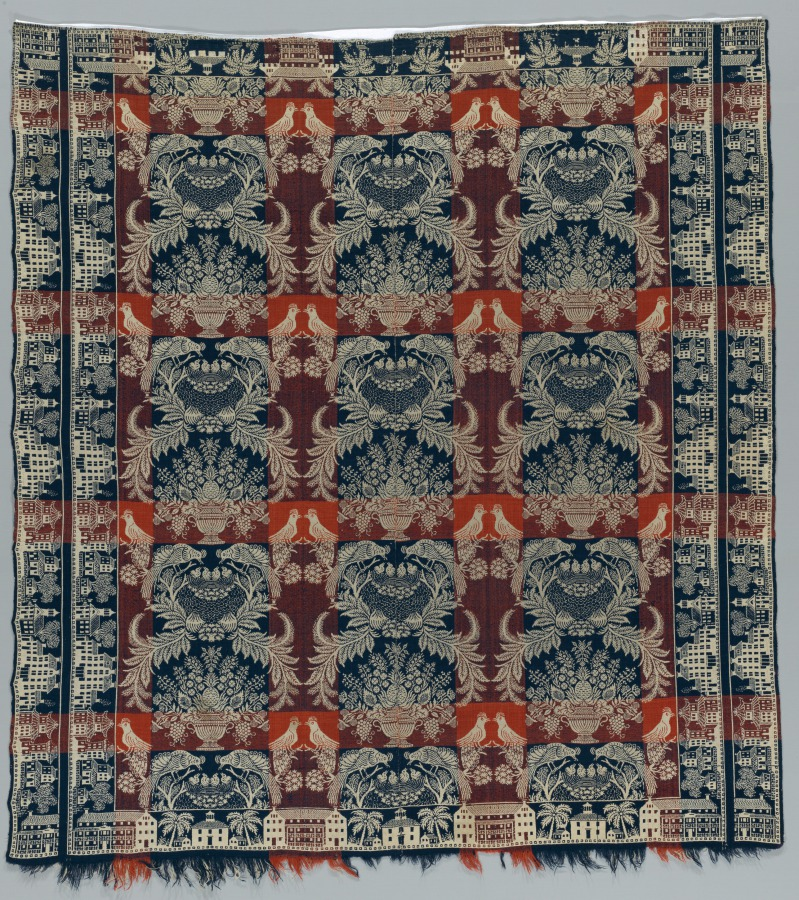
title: Coverlet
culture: America, Ohio, Steubenville, 19th century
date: c. 1820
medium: tabby, double cloth weave, two lengths: wool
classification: Textile